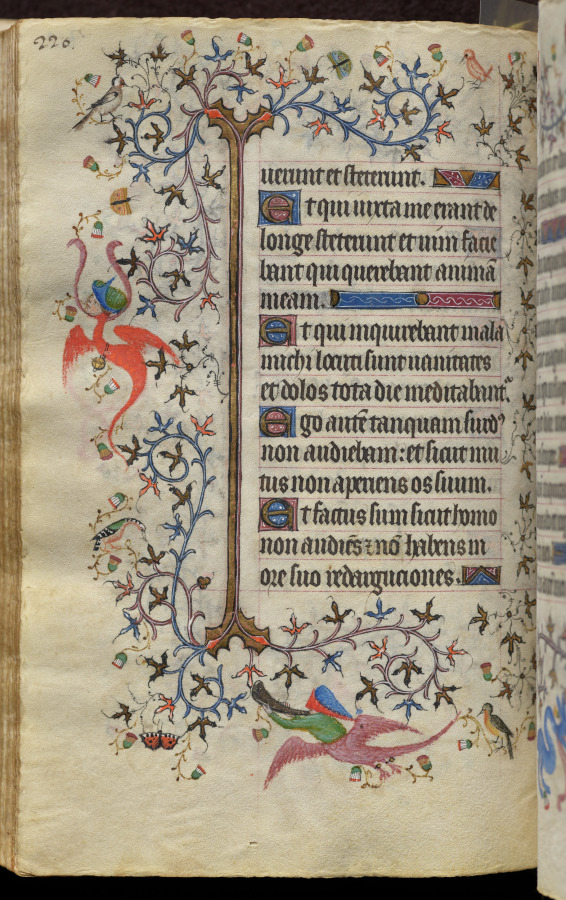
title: Hours of Charles the Noble, King of Navarre (1361-1425): fol. 110v, Text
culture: France, Paris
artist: Master of the Brussels Initials and Associates (French)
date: c. 1405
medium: ink, tempera, and gold on vellum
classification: Bound Volume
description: This precious volume was obviously highly prized by its owner, the French-born King of Navarre, who had his coat of arms painted on no less than twenty folios. Rather than directly commissioning this manuscript from a specific workshop, it seems that Charles the Noble acquired his book of hours -- perhaps ready-made for the luxury market -- while on a trip to Paris in 1404-05. A collaborative effort, six painting styles are evidenced within the pages of this codex, those of two Italians, two Frenchmen, and two Netherlanders. The painter who was responsible for the planning and decoration of the book, and who produced seventeen of the large miniatures, was a Bolognese artist known as the Master of the Brussels Initials. His principal assistant, responsible for most of the borders, was a Florentine who signed his name "Zecho" da Firenze on folio 208 verso.